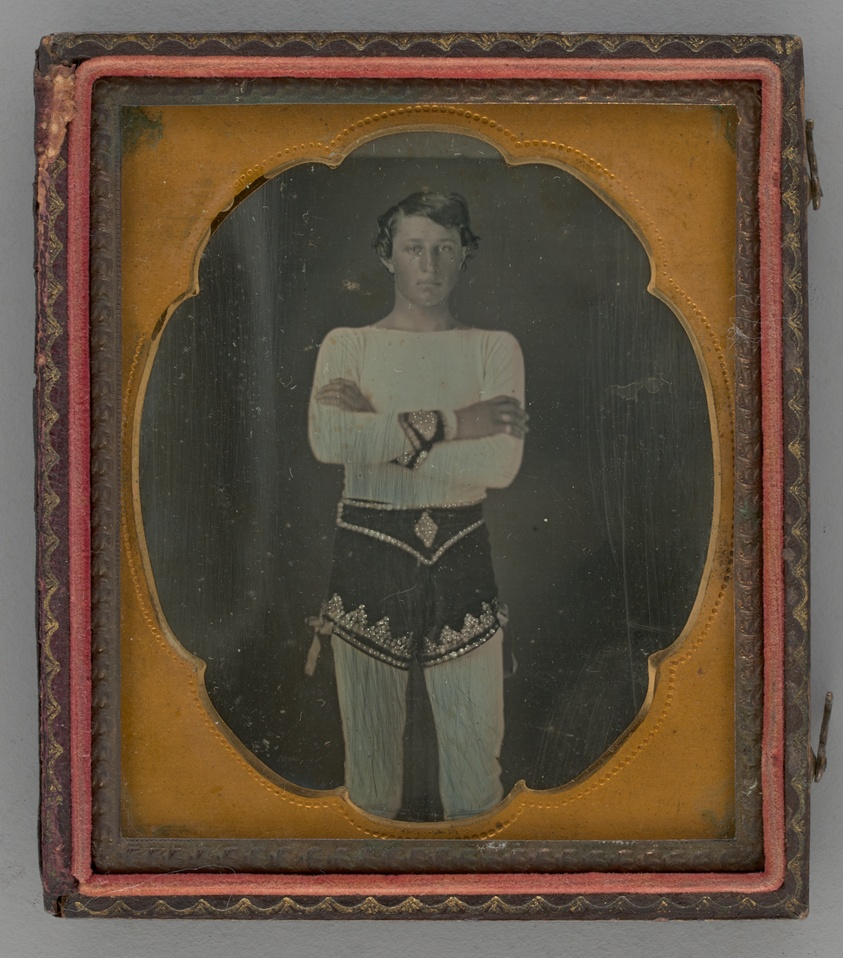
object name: Photograph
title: Untitled (Portrait of a Standing Man)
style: 19th century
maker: Unknown maker; American, 19th century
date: 1867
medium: Daguerreotype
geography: United States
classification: portrait; photography; photographic process; daguerreotype; portrait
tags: lundberg collection, photography, Male, acrobats, men, costume, costumed performer, costumes, portrait, portraits, portraits: male subject